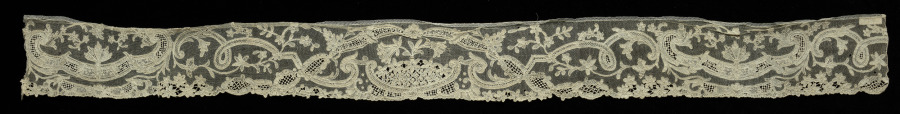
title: Lace Edging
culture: Italy, Burano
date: 1900–1943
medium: Linen: needle lace (Burano Point)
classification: Lace